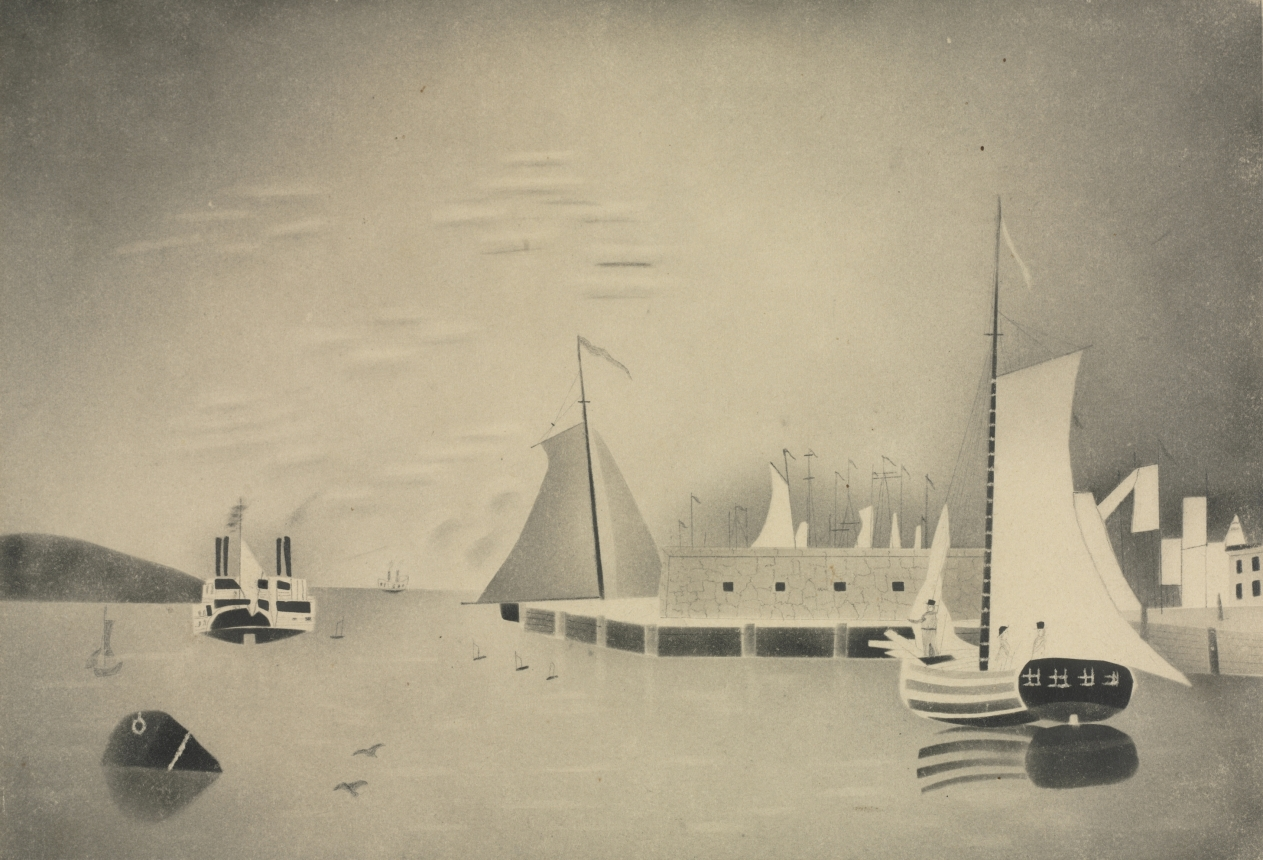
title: Harbor Scene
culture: America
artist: Mary Altha Nims (American, 1817–1907)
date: 1850s or 60s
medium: pencil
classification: Drawing